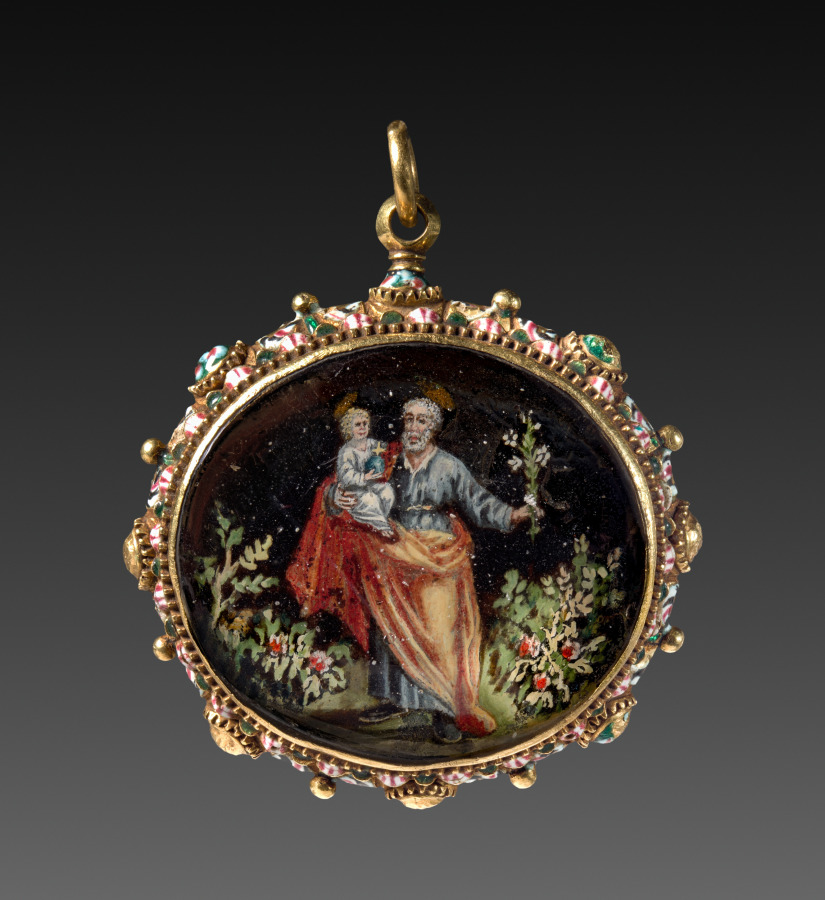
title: Pendant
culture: Spain ?, 17th-18th century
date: 1600s - 1700s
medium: metal and enamel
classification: Jewelry